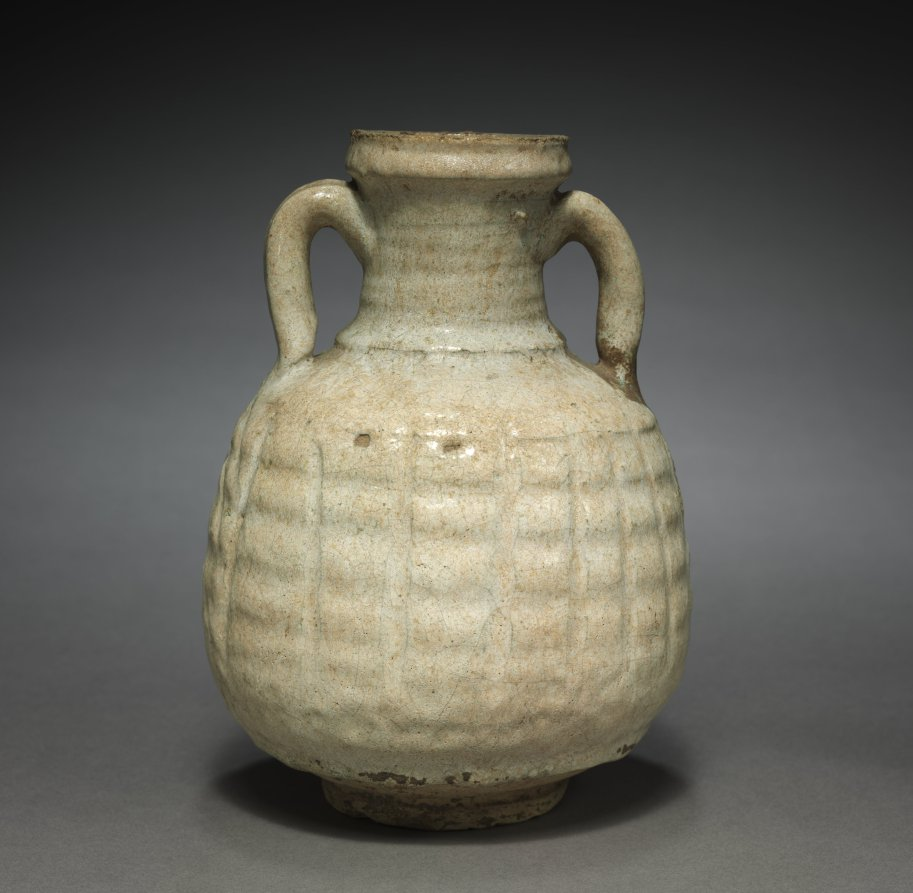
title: Vase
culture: Parthian Empire (247 BCE–224 CE)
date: 1–200 CE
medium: terracotta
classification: Ceramic